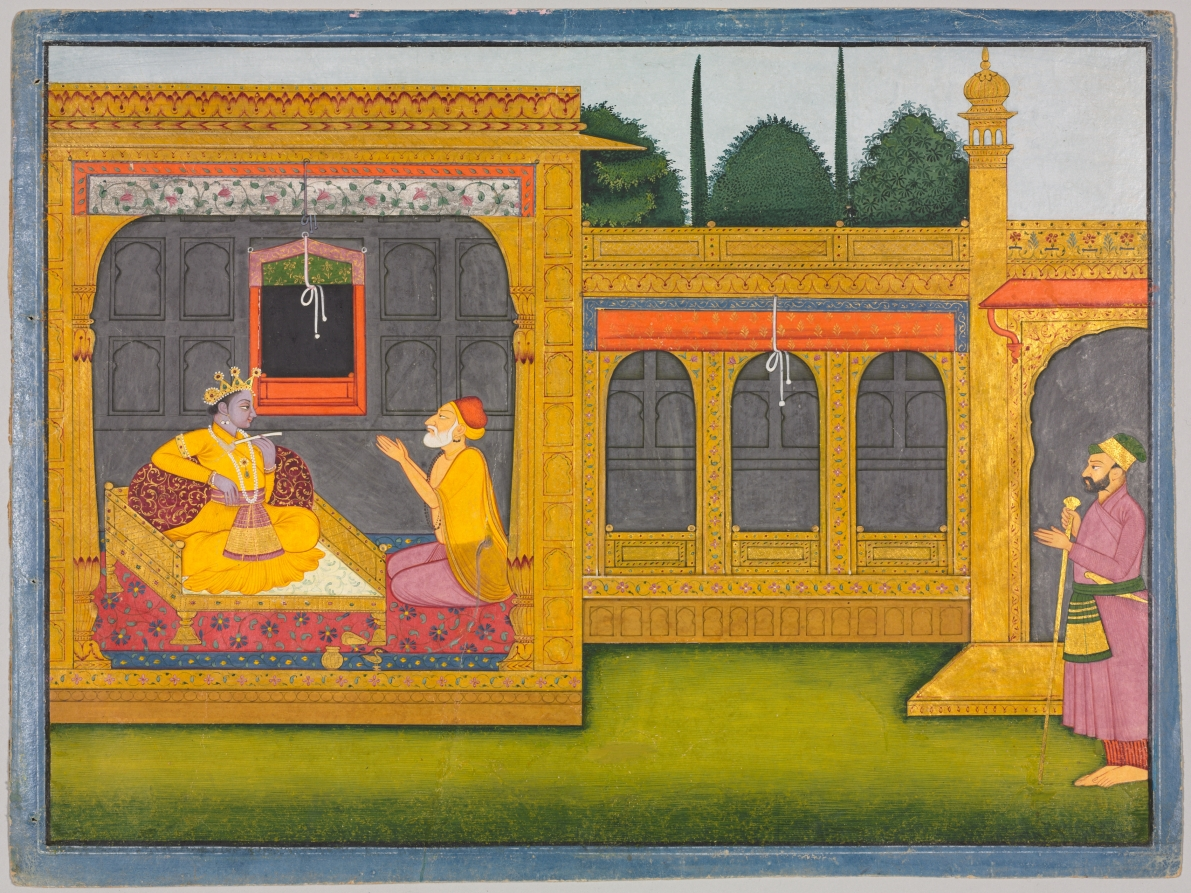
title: The Marriage of Rukmini [Mangal]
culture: India, Pahari Hills, Garhwal school, 18th century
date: 1775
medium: Gum tempera and gold on paper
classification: Painting